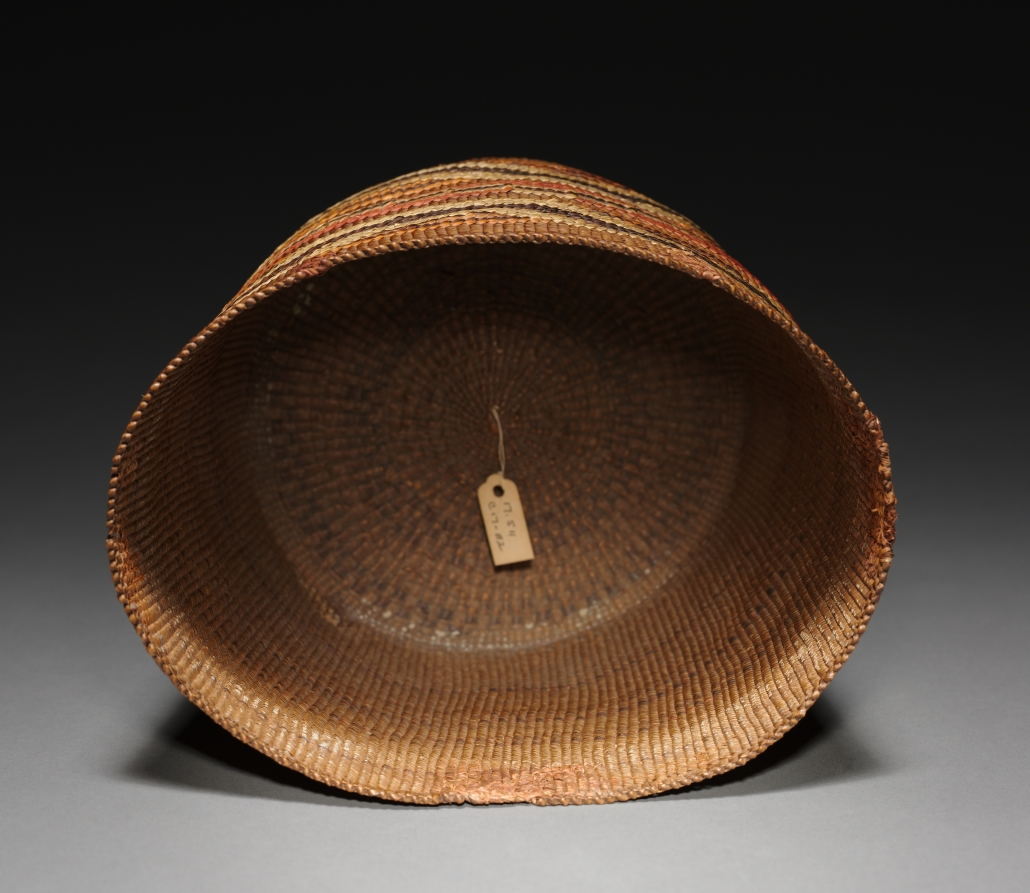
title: Bowl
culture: Northwest Coast, Tlingit, Unassigned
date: Unassigned, before 1917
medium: twined, imbricated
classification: Basketry